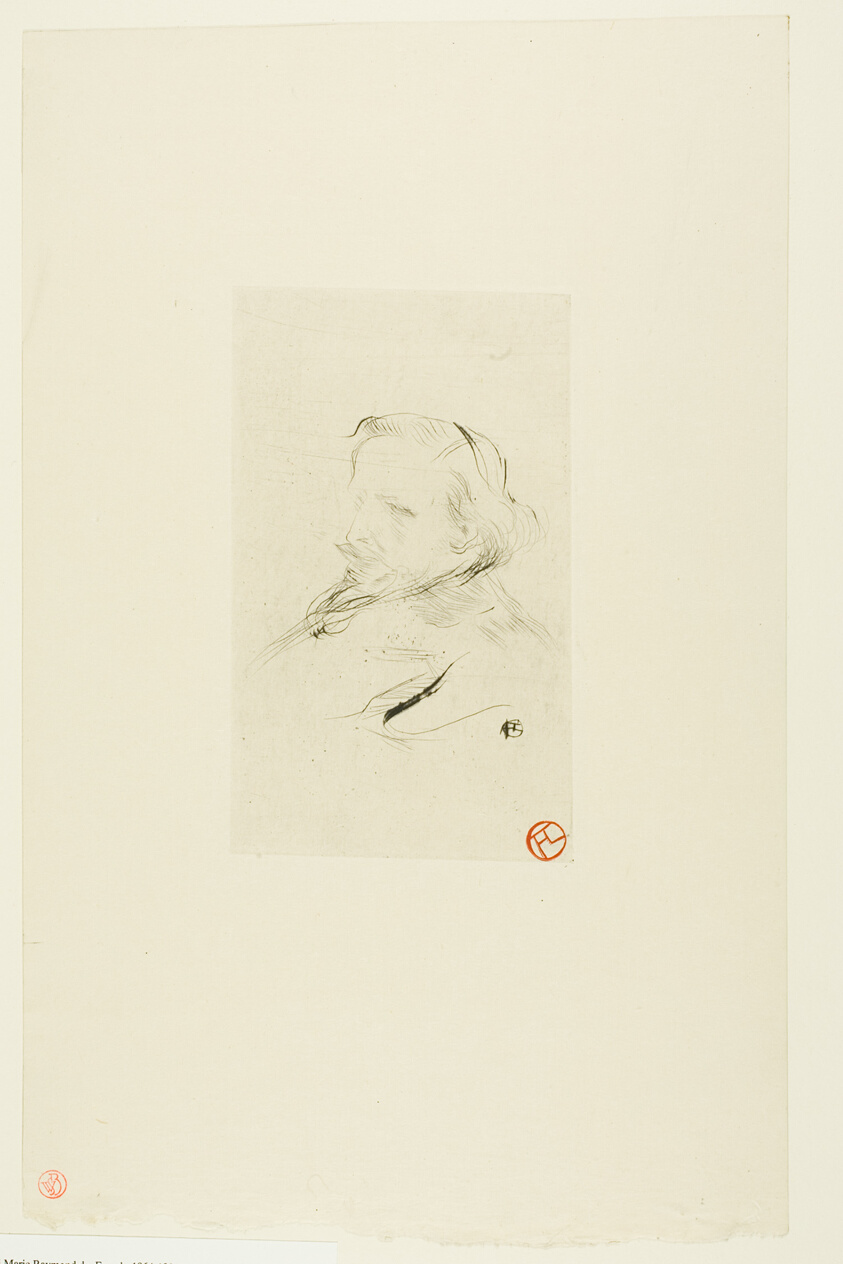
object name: Print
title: Francis Jourdain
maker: Henri de Toulouse-Lautrec (French, 1864-1901)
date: 1898, printed and published 1911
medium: Drypoint from a zinc plate in black on cream wove Japanese paper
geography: France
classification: drypoint; print; prints and drawing